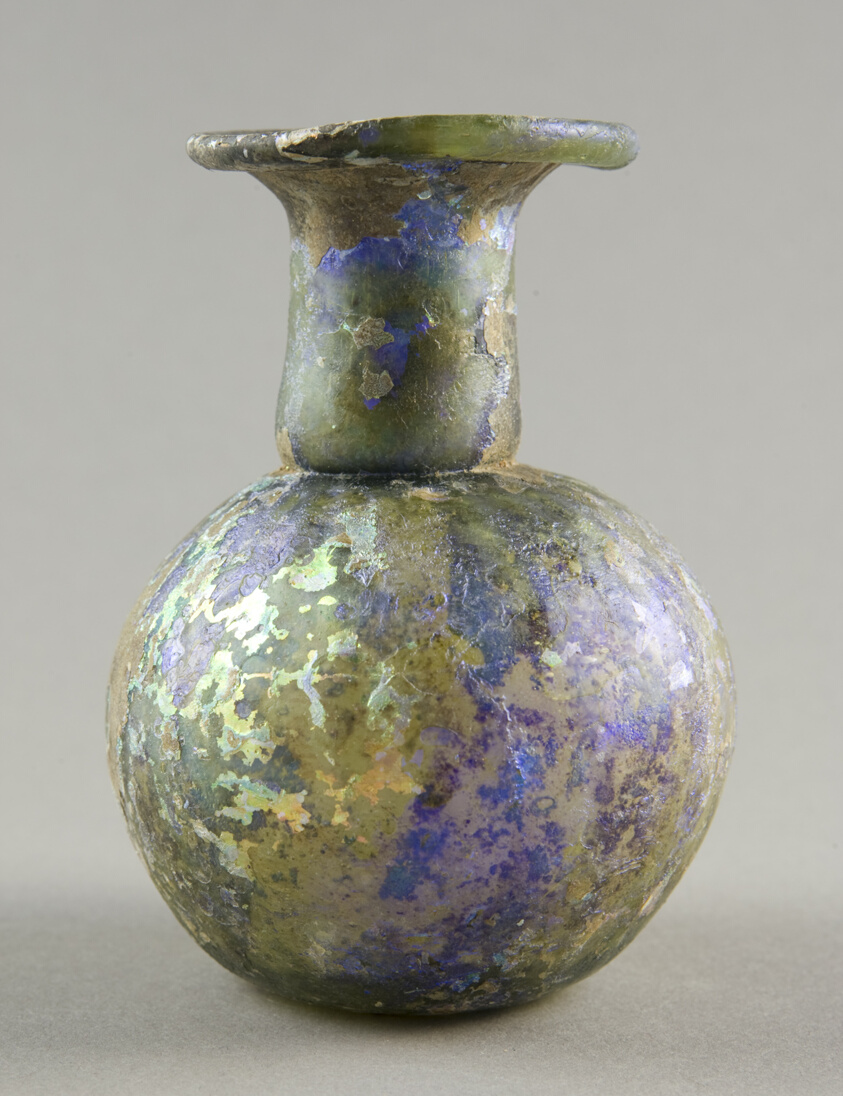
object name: Vessel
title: Jar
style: syrian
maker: Roman; Syria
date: 2nd-4th century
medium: Glass, blown technique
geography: Syria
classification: vessel; glass; ancient art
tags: vessels, containers